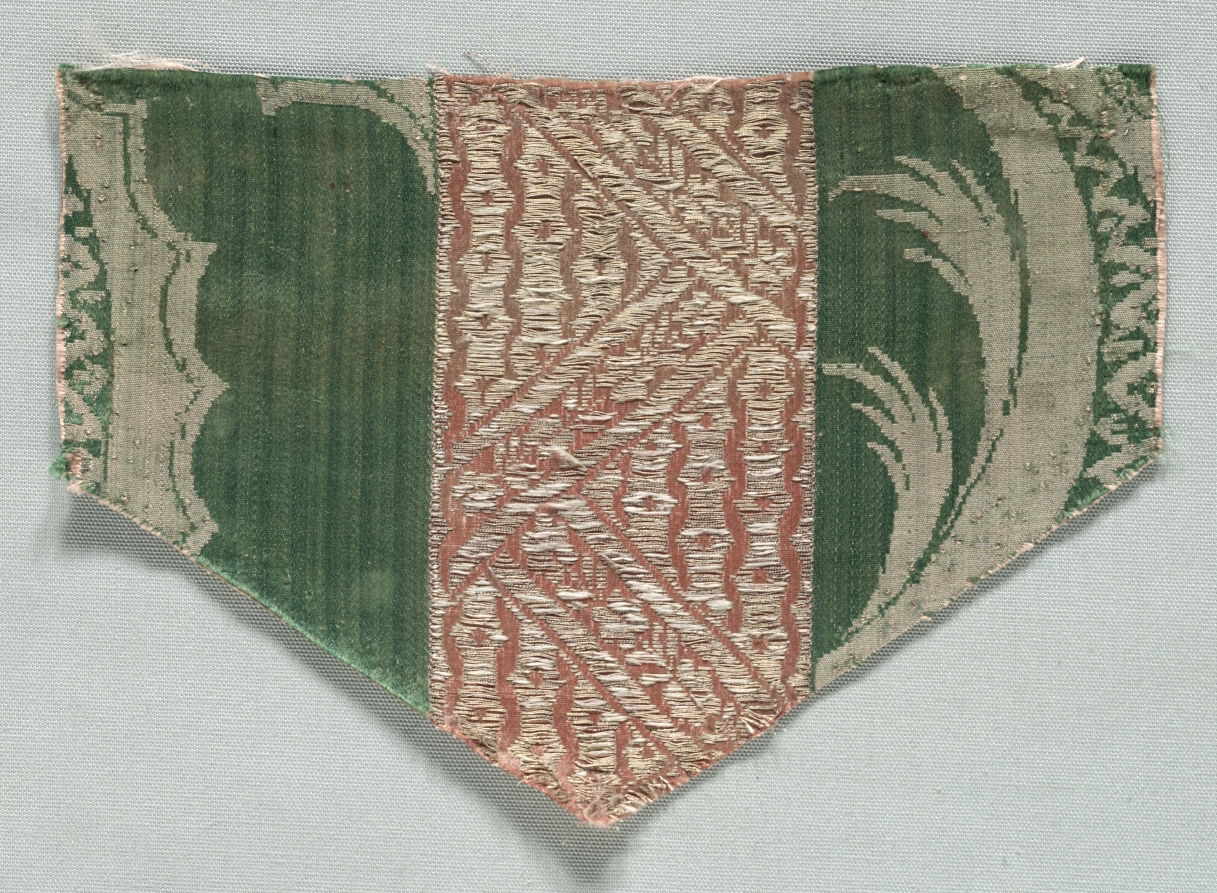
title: Textile Fragment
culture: Italy, 16th century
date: 1500s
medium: damask (?)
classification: Textile